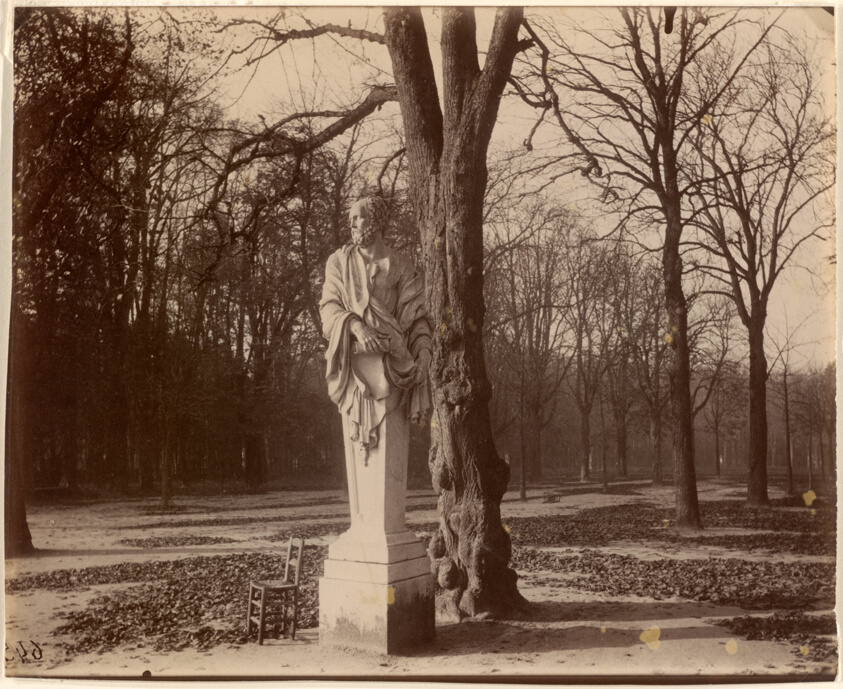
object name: Photograph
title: Versailles, Coin de Parc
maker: Jean-Eugène-Auguste Atget (French, 1857–1927)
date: 1904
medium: Albumen print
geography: France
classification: albumen silver print; photographic process; photography; photograph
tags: Collected by Hugh Edwards